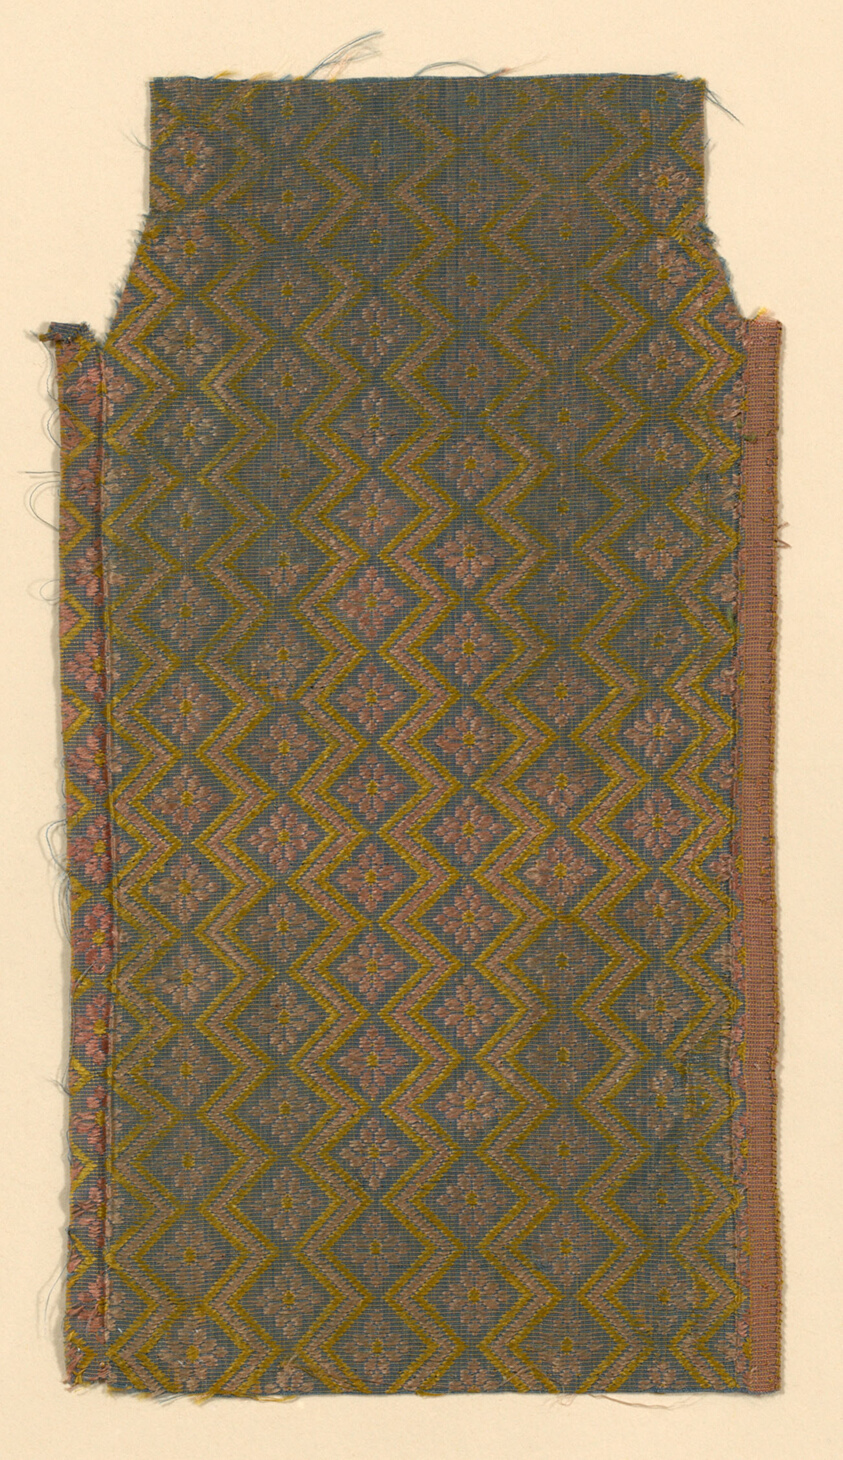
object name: Textile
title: Fragment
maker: Italy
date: 1625/75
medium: Plain compound cloth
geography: Italy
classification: textile; weaving